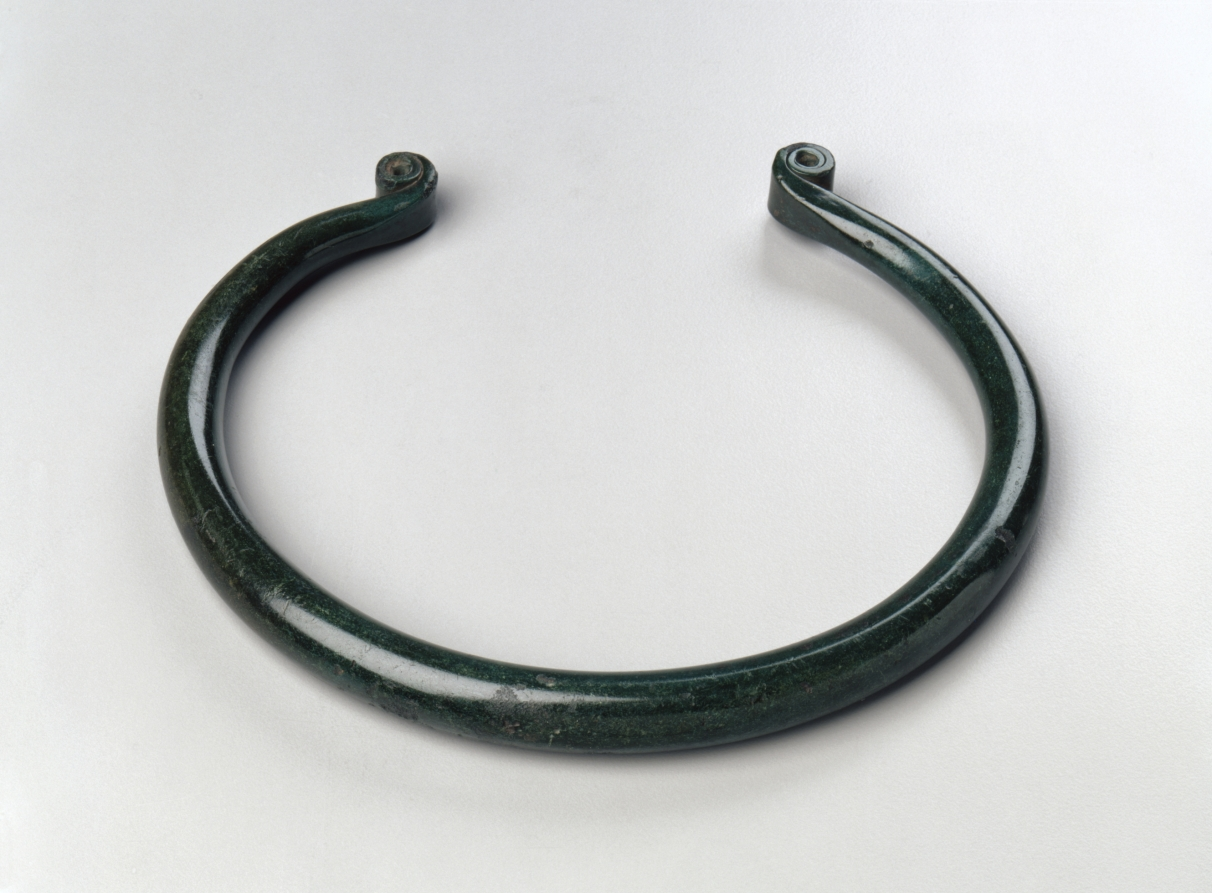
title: Ingot Torque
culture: Hungary, Bronze Age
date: c. 1500 BCE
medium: bronze, wrought bronze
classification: Metalwork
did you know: A torque is a neck ornament usually made of metal.